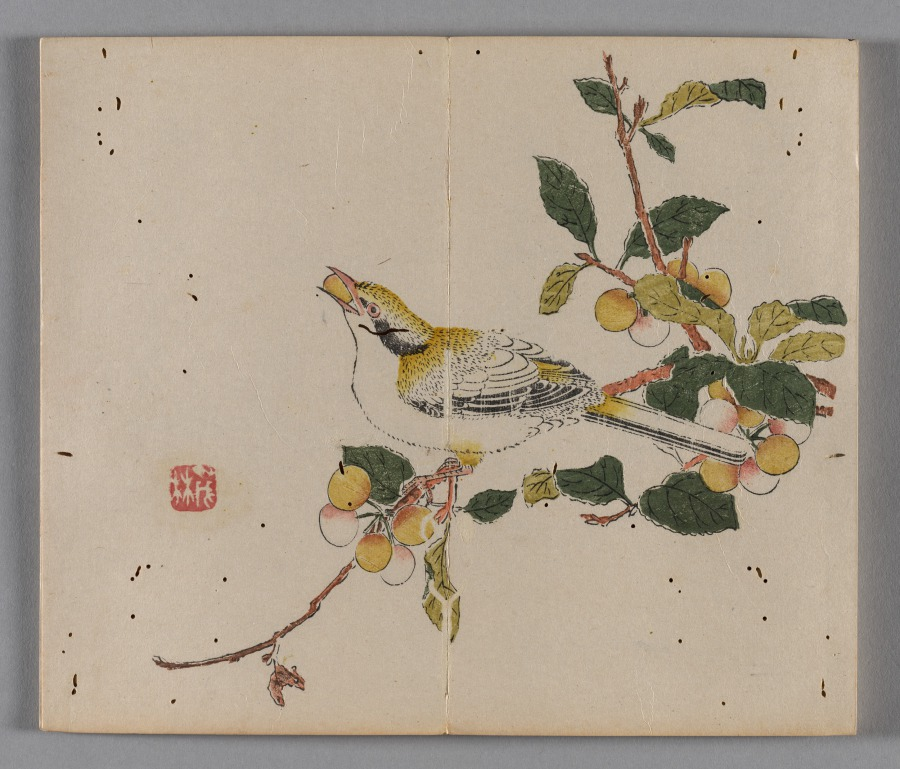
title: Ten Bamboo Studio Painting and Calligraphy Handbook (Shizhuzhai shuhua pu): Miscellaneous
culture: China, Qing dynasty (1644-1911)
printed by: Hu Zhengyan (Chinese, c. 1584–1674)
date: 1633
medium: Woodblock-printed book; ink and colors on paper; first edition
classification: Print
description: Color printing reached a level of perfection in the early 1600s, as seen in this Ten Bamboo Studio Collection of Calligraphy and Painting and the Mustard Seed Garden Manual of Painting (printed 1679 and 1701). The painterly quality, precision in registering (aligning) the woodblocks, and harmonious colors made them the most successful color print editions in Chinese history. Both editions were printed and compiled in Nanjing, spread nationwide, and had a great impact on the arts in Japan and Korea.